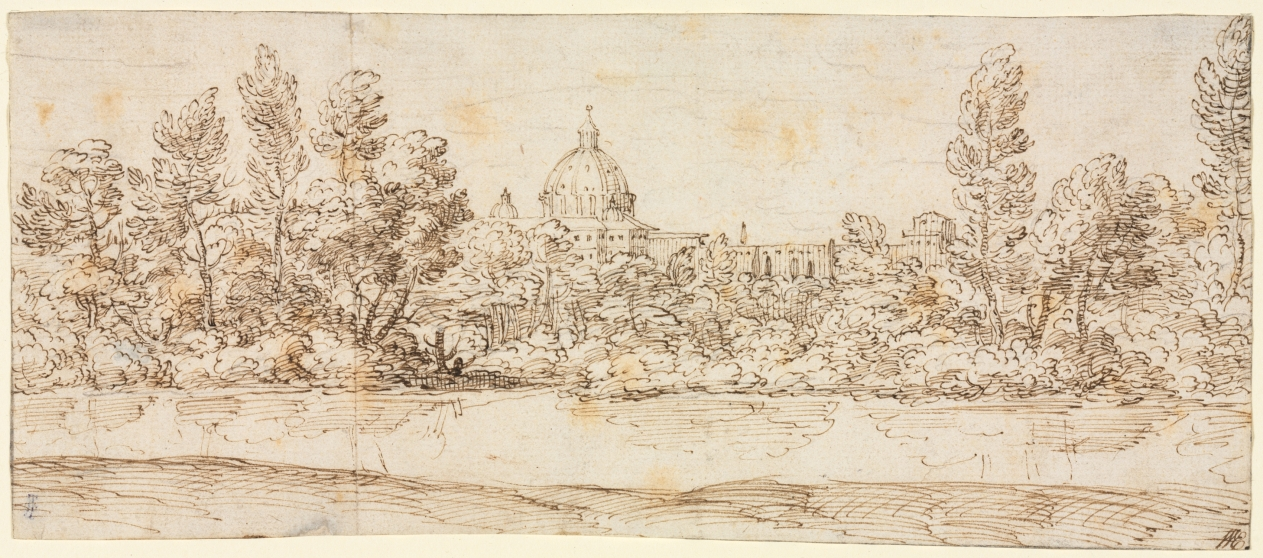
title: River Landscape with View of St. Peter's Basilica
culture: Italy, 17th century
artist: circle of Giovanni Francesco Grimaldi (Italian, 1606–1680)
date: after 1660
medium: pen and brown ink over traces of black chalk; framing lines in graphite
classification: Drawing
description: With much of Saint Peter’s Basilica obscured by the energetic lines that form the foliage, the building appears integrated into the landscape in this river scene. What stands out is the massive dome jutting from the tree line. Designed by Michelangelo in 1547, the dome was completed in 1590, after his death. Michelangelo made many contributions to the architecture of Rome, but it was the dome of Saint Peter’s that fundamentally altered the city’s iconic skyline. Although loosely sketched and without fine detail, the dome in this drawing remains immediately recognizable as an emblem of Rome.